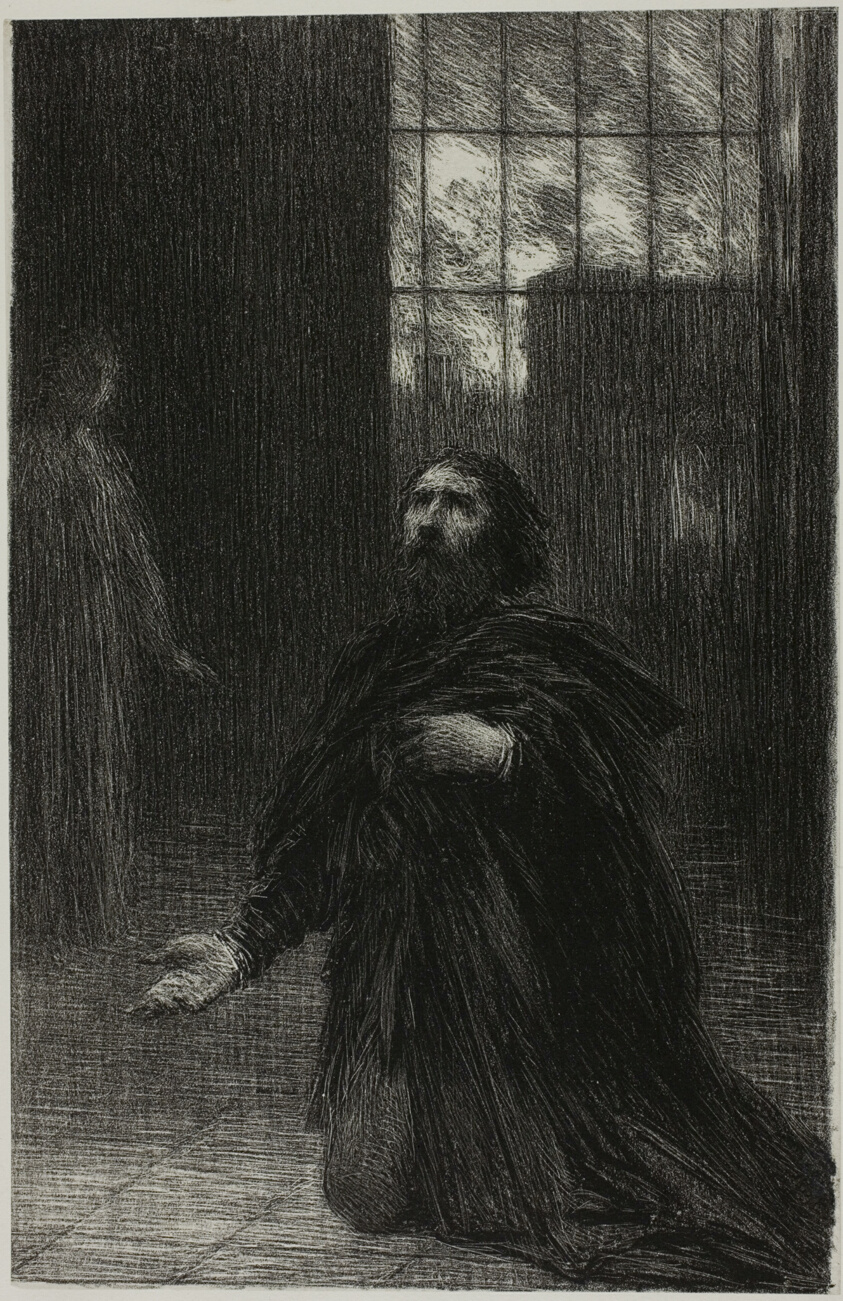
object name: Print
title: Rienzi, Act V: Rienzi's Prayer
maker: Henri Fantin-Latour (French, 1836-1904)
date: c. 1886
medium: Lithograph on off-white China paper laid down on white wove paper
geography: France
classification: lithograph; print; prints and drawing